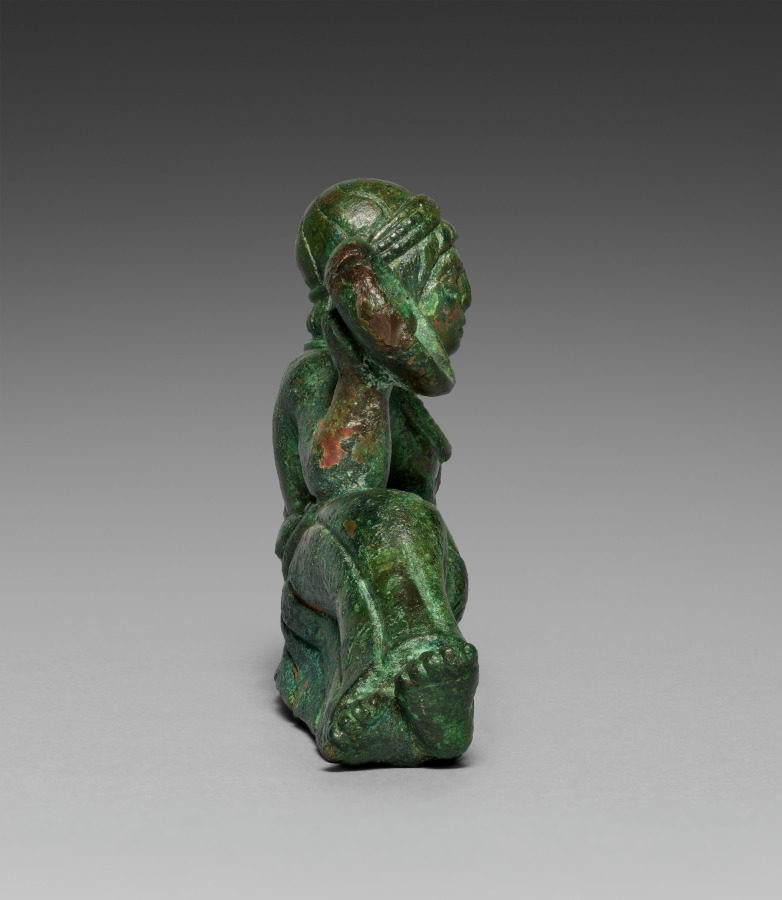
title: Vessel Ornament of Banqueter Holding an Omphalos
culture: Etruscan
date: probably 400–375 BCE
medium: bronze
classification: Sculpture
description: This bronze banqueter figurine was one of six once adorning the rim of a large basin, now lost. Cast in molds with individualized details, most have grooves on their underside to attach to the basin. Minute traces of gilding remain on areas of clothing and skin (mostly visible only under magnification), suggesting that they may have been completely gilded. Two handles in the form of hippocampi, horses with serpentine tails, also belonged to the basin and are now displayed at the Michael C. Carlos Museum at Emory University. The basin may have been used to hold liquid for a banquet, or was perhaps funerary. This bronze figurine holds a phiale mesomphalos, a shallow wine bowl, in his right hand. The vessel is tilted upward as if to spill its contents, perhaps as a libation for the gods. Traces of gilding remain in the corners of the phiale mesomphalos and the figurine’s drapery. His left hand rests against a fold of cloth slipping over his shoulder. A garland lies on his bare chest and another crowns his head. The banqueter shares many similarities with 1987.158.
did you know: Though primarily associated with dedicatory libations, the phiale mesomphalos could also be used for drinking.